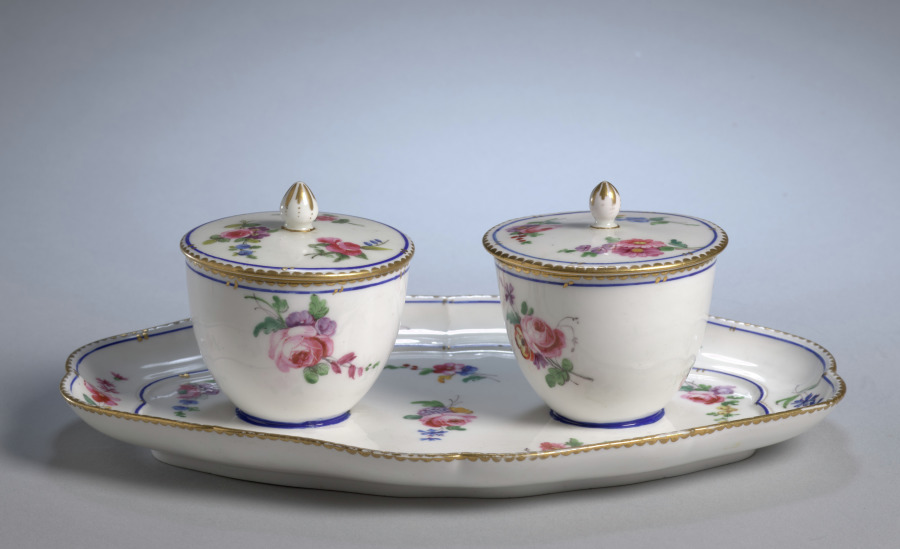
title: Jam Pots on Stand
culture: France, 18th century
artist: Sèvres Porcelain Factory (French, est. 1756)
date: c. 1760's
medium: porcelain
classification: Ceramic